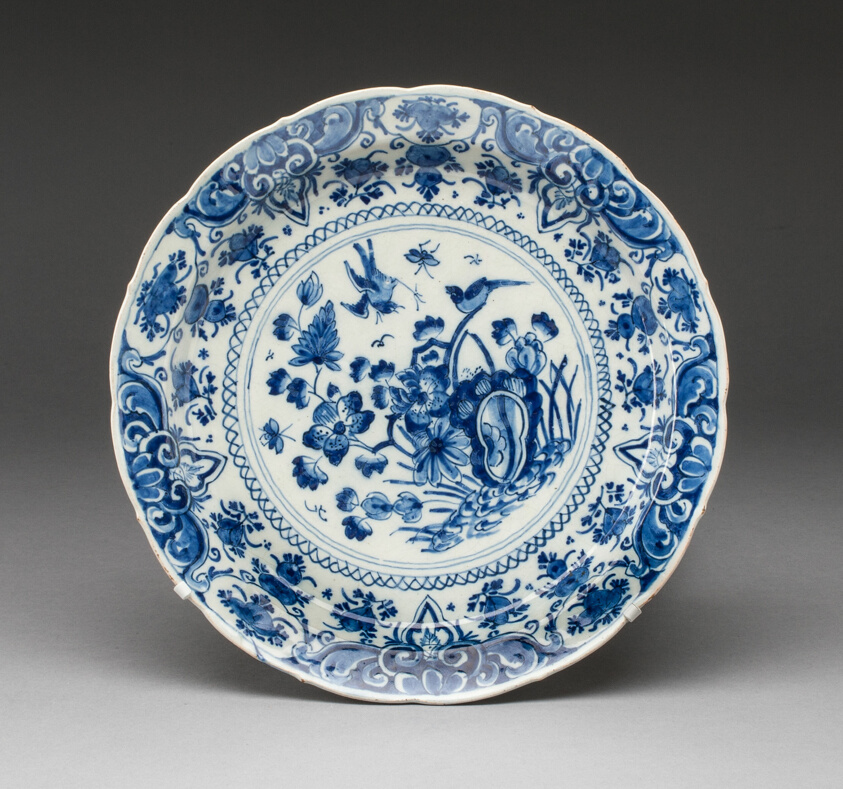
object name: Ceramics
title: Plate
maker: De Witte Ster (The White Star) Factory; Delft, Netherlands, 1660-1803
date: c. 1720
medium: Tin-glazed earthenware (Delftware)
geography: Delft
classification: plate (general, dish); dish (vessel); earthenware; ceramics; european decorative arts